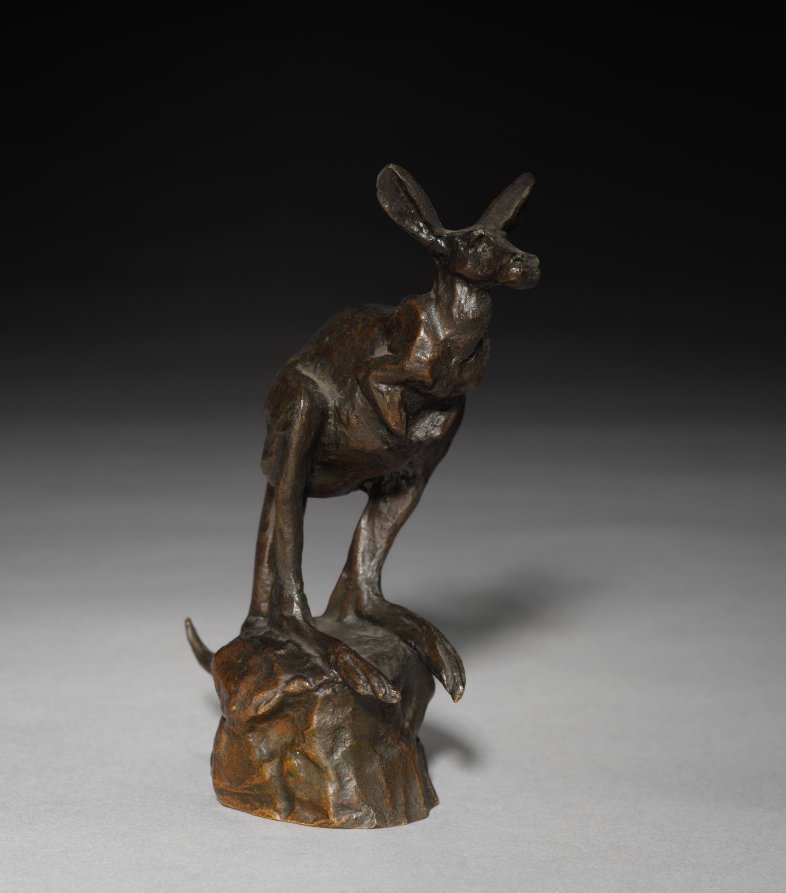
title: Kangaroo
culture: France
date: c. 1900–1925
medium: bronze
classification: Sculpture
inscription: Signed Nottot (?); ANDRO. FONDEUR, lower base